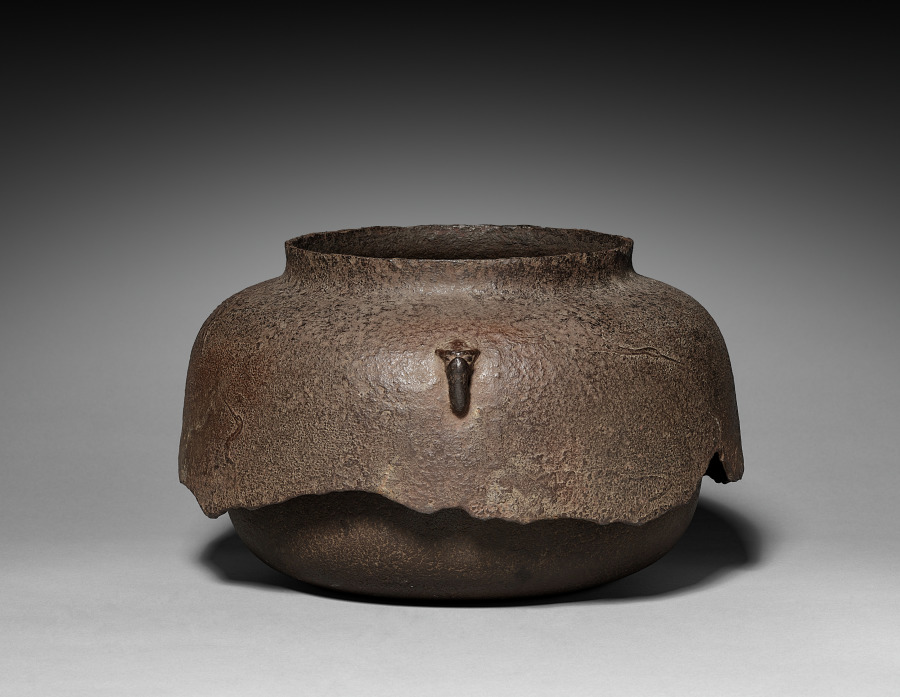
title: Kettle with Crane Design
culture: Japan, Muromachi period (1392–1573)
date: 1392–1573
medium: iron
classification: Metalwork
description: Water supplied from a jar such as the fine Shino-ware vessel (CMA 1972.9.a-b) was transferred to an iron kettle for boiling as part of the tea ceremony. Former CMA director Sherman Lee described the jagged, broken skirt of this kettle as "attractively damaged," complementing the unobtrusive wispy designs on its rough metal surface. The character of this kettle—worn, coarse, the "perfection" of symmetry destroyed—was cherished by tea masters for its powerful humility.